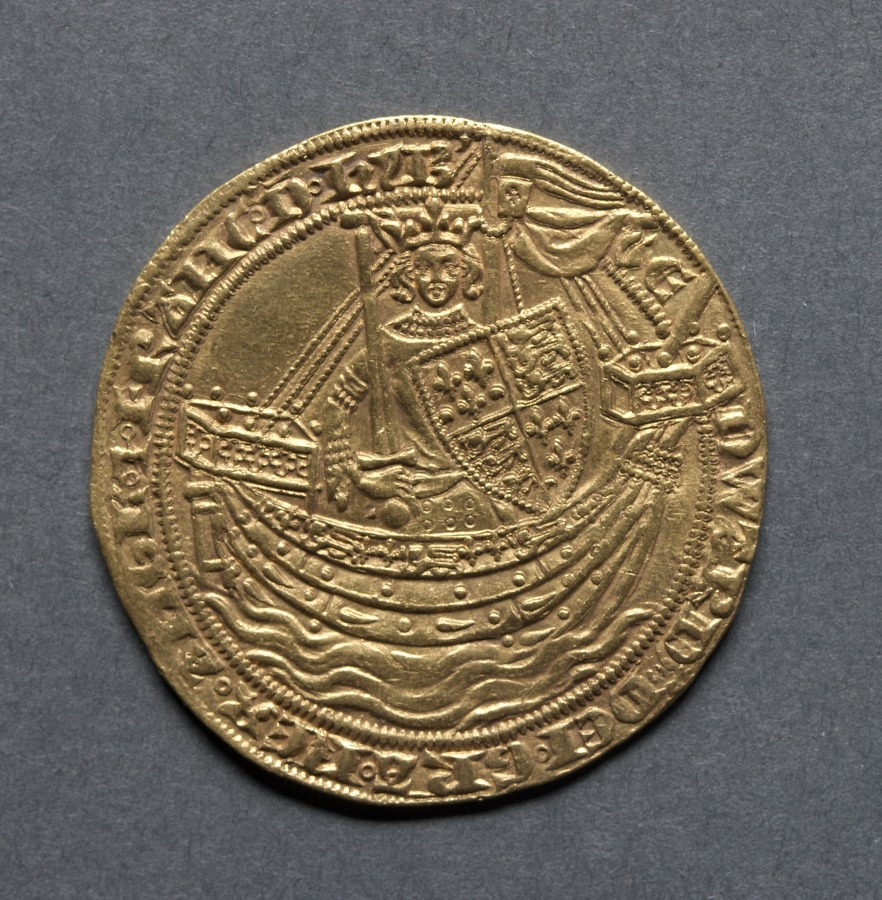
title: Noble: Edward III Standing in Ship with Shield of Arms (obverse); Ornamental Cross with Lis Terminals (reverse)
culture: England, Edward III, 1327-1377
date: 1351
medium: gold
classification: Coins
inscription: EDWARD DEI GRA REX ANGLE Z FRANC D HYB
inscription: IHES AVTEM TRANSIENS PER MEDIV. ILLORV IBAT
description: Bearing in mind the primitive tools and methods of production in the 1300s, this noble, and other similar pieces are remarkable for their beauty and fineness of detail. In all the indentures of this period a clause was inserted providing for the trial of the Pyx. The Master of the Mint was supposed to place in the Pyx, a small box, a sample of all coins struck. These were left for three months and then tested by a committee to verify the weight and fineness. For many centuries the Trial of the Pyx took place in the Pyx Chamber at Westminster Abbey which visitors may still see today. In the 1800s the trial was transferred to Goldsmiths Hall where it is still held annually. Each three months some initial or secret mark was put on the coin to show that another three month period had started. These marks consisted of initial marks plus combinations of single or double annulets, broken annulet, unbarred N's, reversed S's, and so forth.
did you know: The noble was the first English gold coin produced in larger numbers and was introduced by King Edward III.